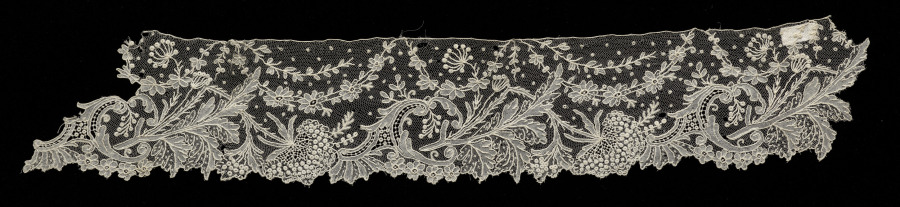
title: Lace Edging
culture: Belgium, Brussels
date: 1800s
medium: Linen: needle lace (point de gaze)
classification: Lace